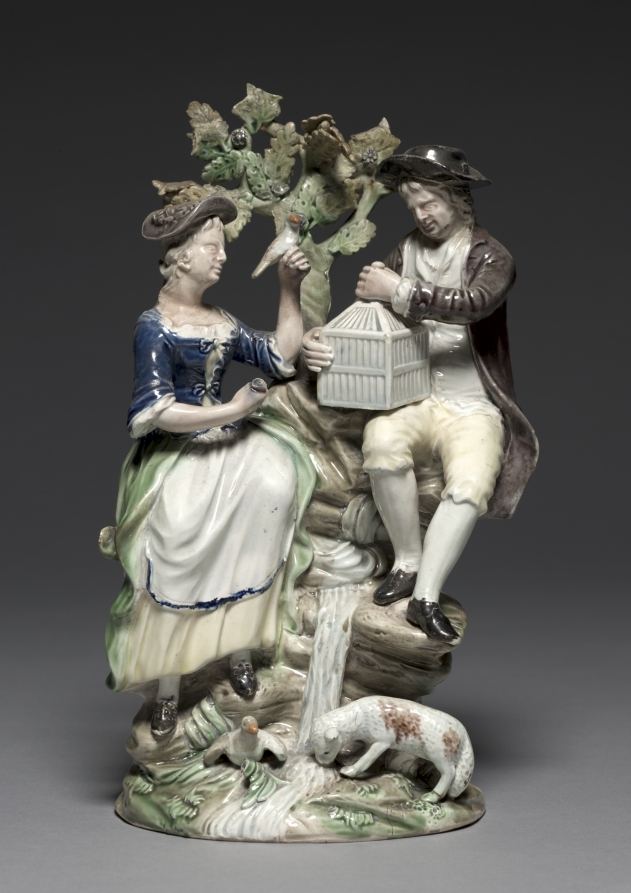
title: Group with Birdcage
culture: England, Staffordshire, 18th century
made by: Staffordshire Factory (British)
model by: John Voyez (French)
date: c. 1770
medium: lead glazed earthenware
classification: Ceramic